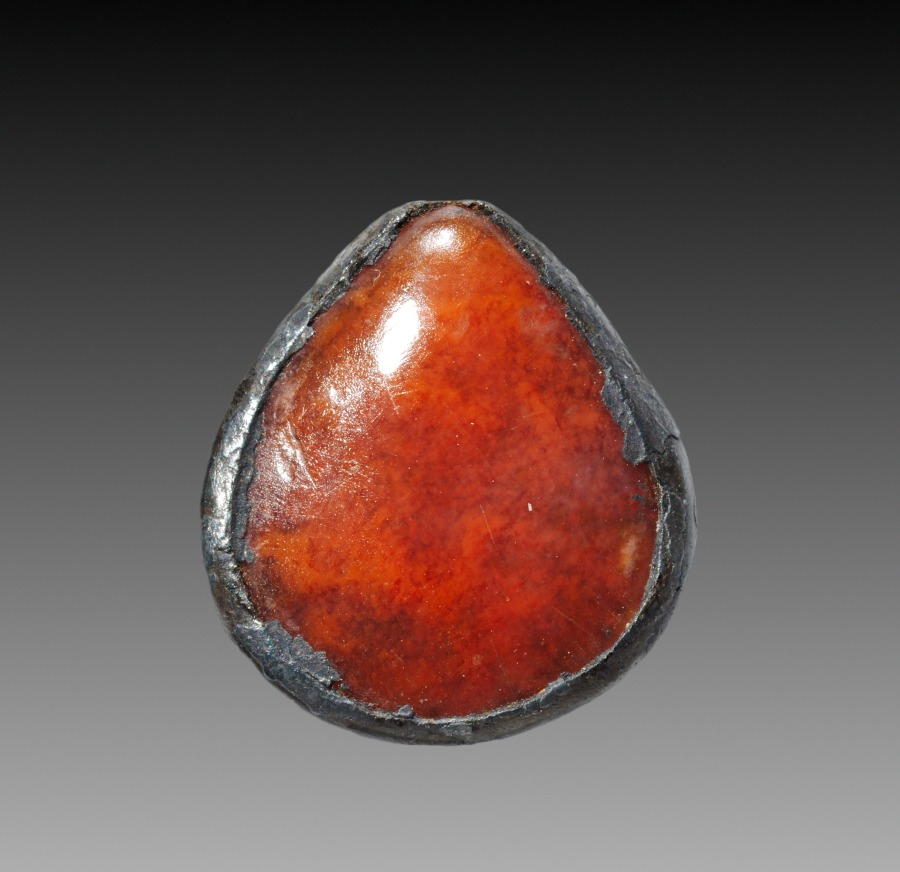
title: Oyster-Shell Pendants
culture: Egypt, Middle Kingdom (2040–1648 BCE), Dynasty 12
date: 1980–1801 BCE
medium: carnelian and silver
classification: Jewelry